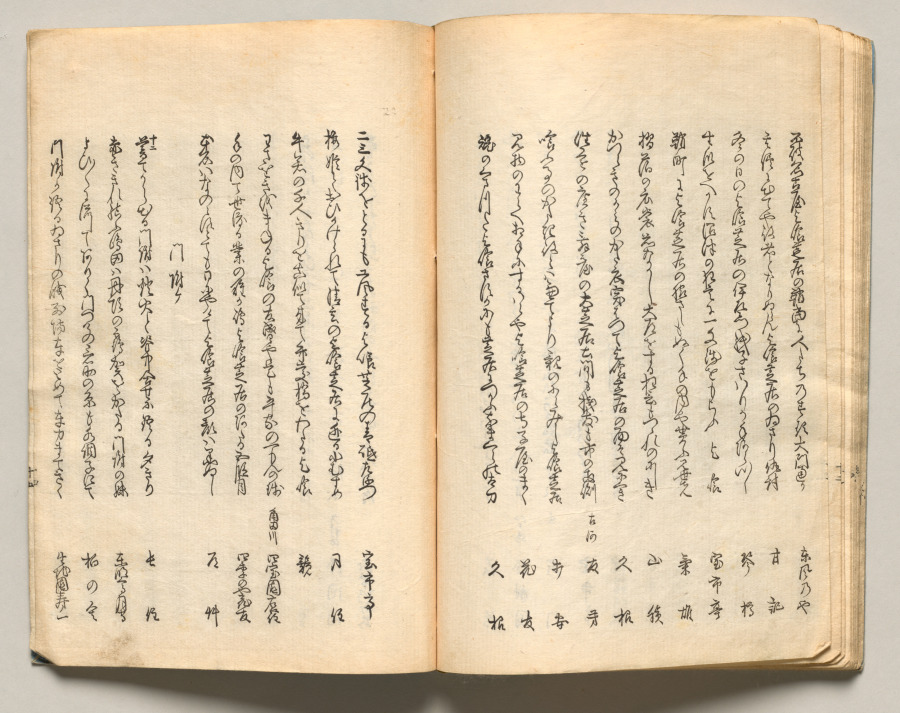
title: Spread Twenty-One from Volume Three of People of Japan in Light Verse (Kyōka)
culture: Japan, Edo period (1615–1868)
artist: Utagawa Hiroshige (Japanese, 1797–1858)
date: 1857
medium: Woodblock-printed book; ink and color on paper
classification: Bound Volume